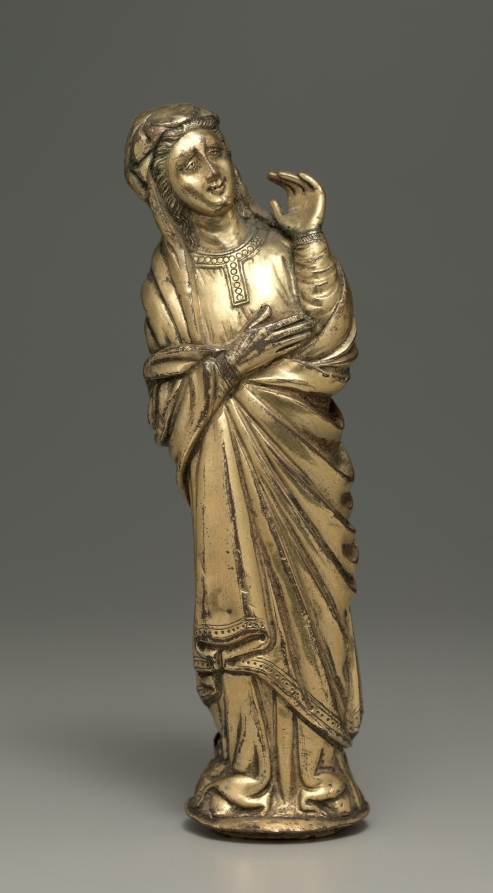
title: Mourning Virgin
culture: Austria, Upper Rhine, 15th century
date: early 1400s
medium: gilt copper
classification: Sculpture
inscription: These small statuettes would have originally flanked a crucifix as suggested by this arrangement. According to the Gospels, the Virgin and Saint John were present on Golgotha at Christ’s death. Medieval artists frequently depicted them standing next to the cross.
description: These small statuettes would have originally flanked a crucifix as suggested by this arrangement. According to the Gospels, the Virgin and Saint John were present on Golgotha at Christ’s death. Medieval artists frequently depicted them standing next to the cross.